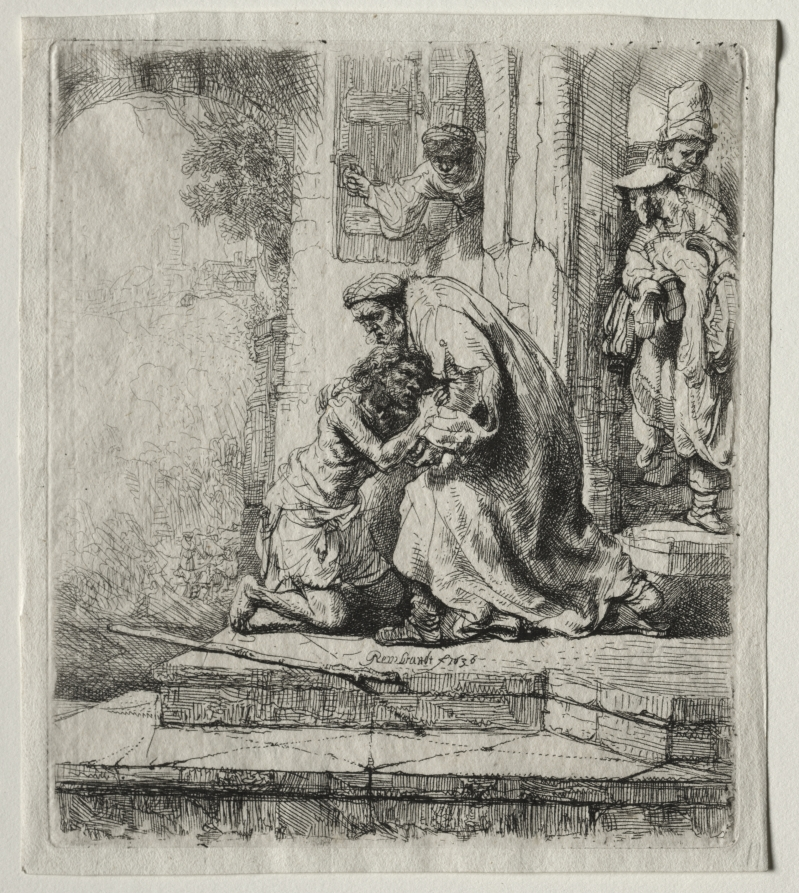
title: Return of the Prodigal Son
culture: Netherlands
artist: Rembrandt van Rijn (Dutch, 1606–1669)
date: 1636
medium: etching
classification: Print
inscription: lower center, in plate: Rembrandt f 1636 ; lower right, in graphite: 11 ; VERSO, lower left, in graphite: M ; lower left, in graphite: B. 91 ; lower right, in graphite: C.7495 ; lower right, in graphite: 30